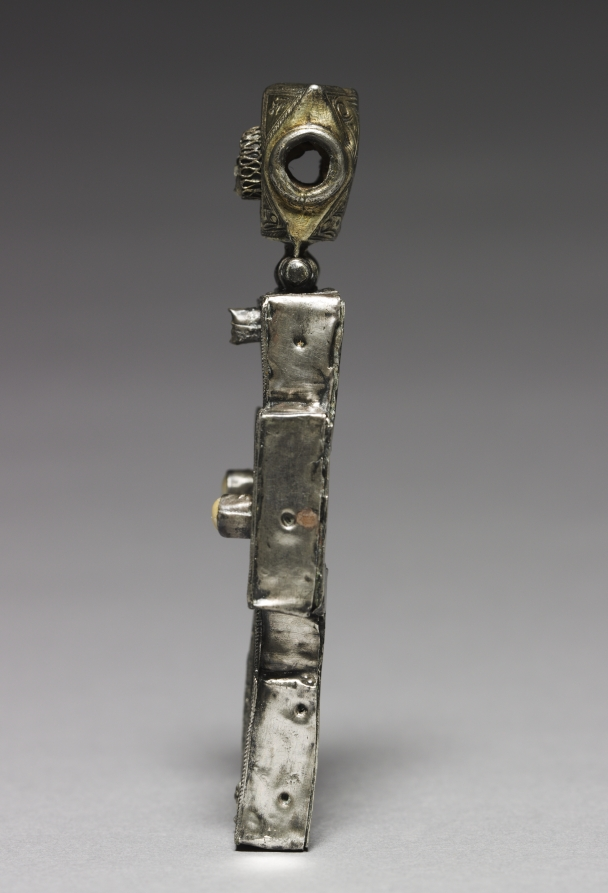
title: Pectoral Cross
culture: Byzantium, Russia, Byzantine period, 17th century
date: 1600s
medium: walrus ivory, wood, partially gilt silver and pearls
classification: Ivory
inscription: Slavonic inscriptions on obverse and reverse.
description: This ivory cross is carved on the front with scenes drawn from Twelve Feasts of the Orthodox Church, including the Passion and Resurrection of Christ; on the reverse is a scene of the Mother of God surrounded by clergy. The scenes include Slavonic inscriptions. The ivory cross is mounted within a silver frame as a pectoral to be worn at the breast, probably by a priest.